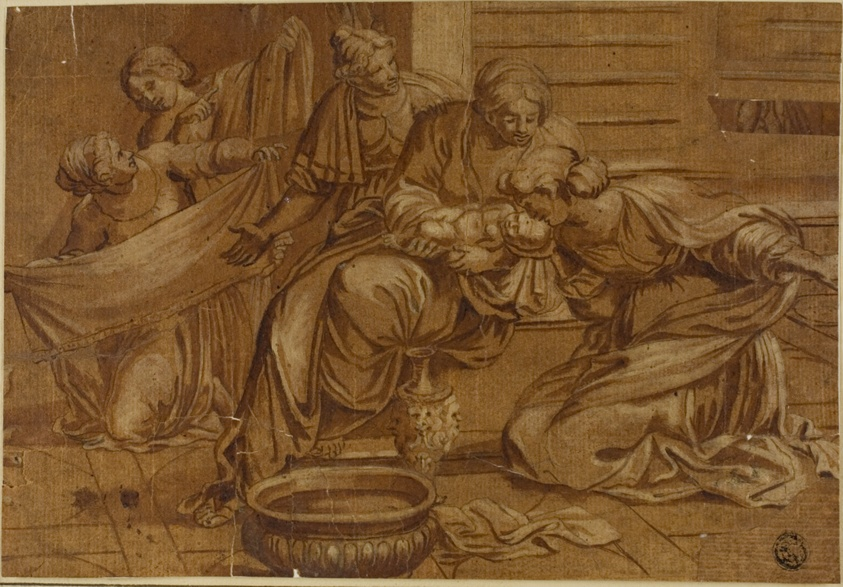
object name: Drawing and Watercolor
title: Birth of the Virgin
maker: School of Domenichino (Italian, 1581-1641)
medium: Pen and brown ink, with brush and brown wash, heightened with white oil paint, on brown laid paper, laid down on cream laid paper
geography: Italy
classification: ink or chalk wash; drawings (visual works); prints and drawing